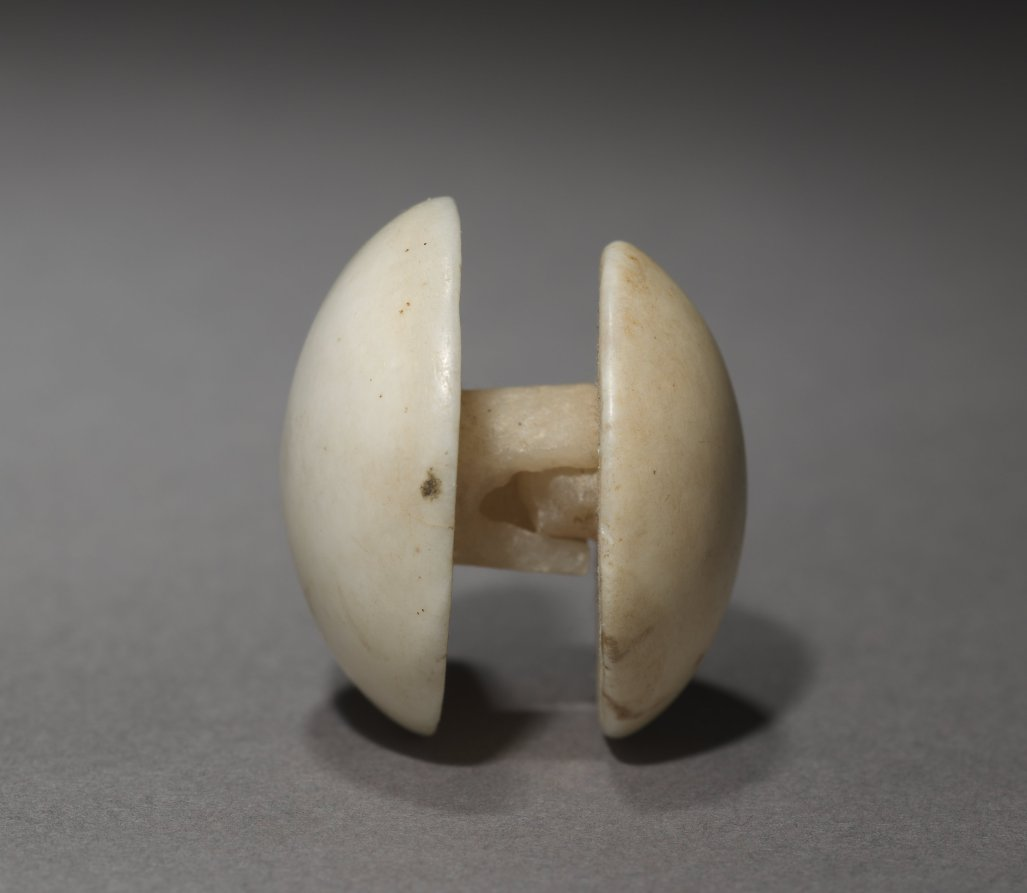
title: Pair of Ear Studs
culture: Egypt, New Kingdom (1540–1069 BCE), Dynasty 18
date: 1540–1296 BCE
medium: travertine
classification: Jewelry